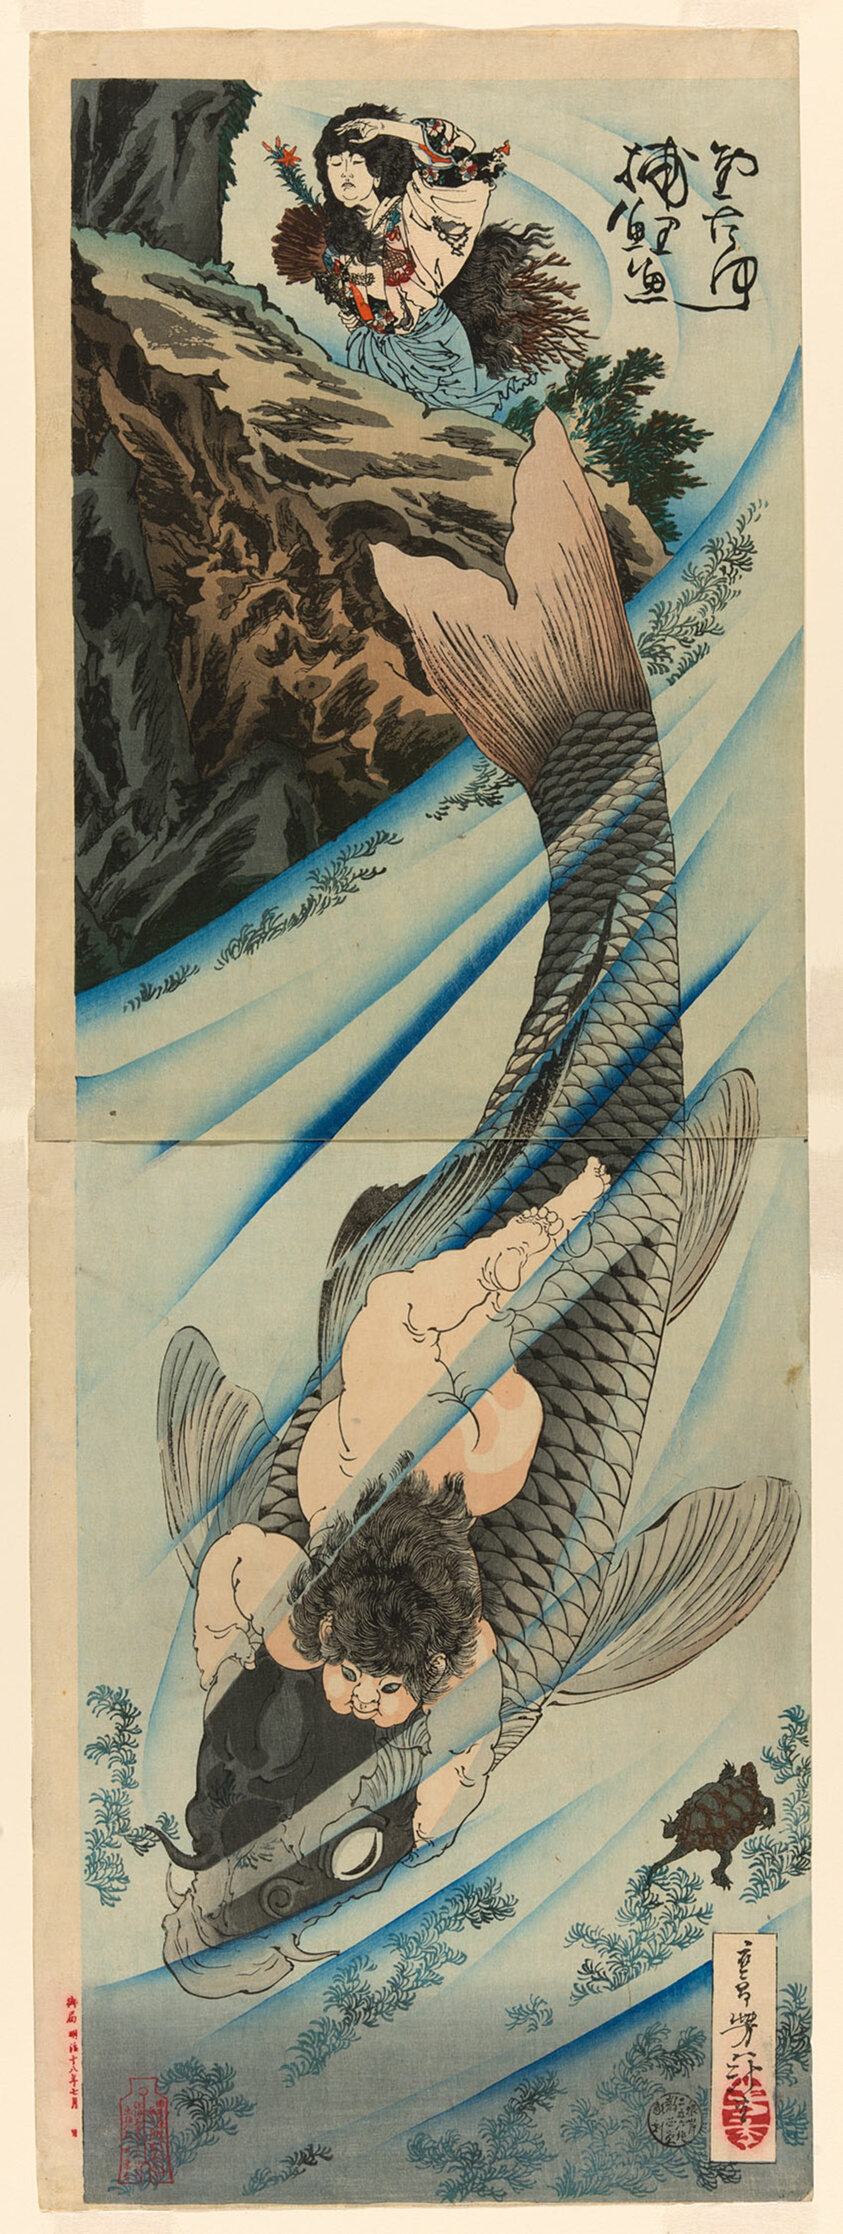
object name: Print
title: Kintaro Captures the Carp (Kintaro rigyo o torau)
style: Japanese (culture or style)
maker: Tsukioka Yoshitoshi (Japanese, 1839–1892)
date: July 1885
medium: Color woodblock prints; oban diptych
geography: Japan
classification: woodblock print; print; asian art